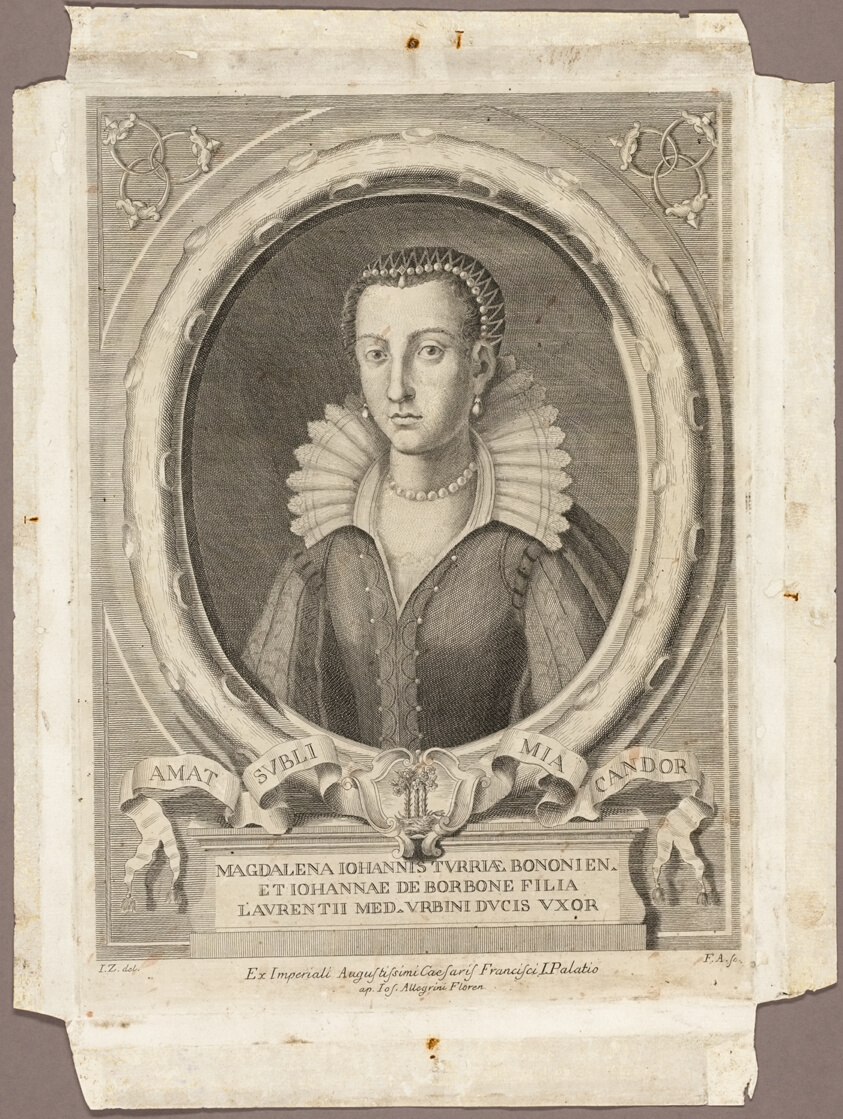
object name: Print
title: Madeleine de la Tour d'Auvergne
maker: F.A. (German?, active 18th century); after I.Z. (German?, active 18th century); published by Giuseppe Allegrini, Florence, 1761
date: published 1761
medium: Engraving on ivory laid paper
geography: Germany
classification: engraving; paper; print; prints and drawing